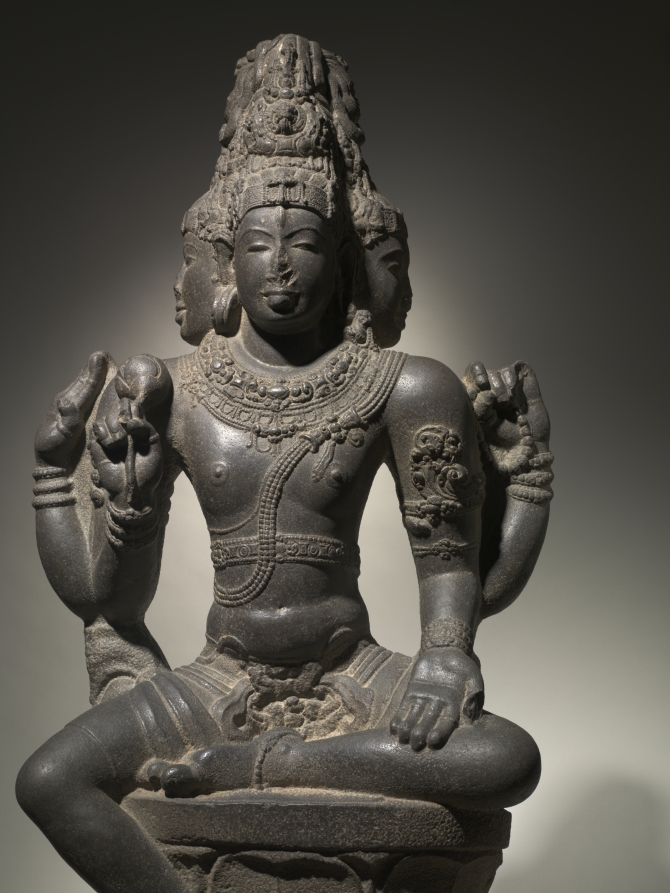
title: Brahma-Shiva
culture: South India, Tamil Nadu, Chola dynasty, late 10th - early 11th century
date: late 900s–1000s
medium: granite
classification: Sculpture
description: In the Hindu pantheon Brahma is in charge of carrying out the work of creation. In this tour-de-force of South Indian temple sculpture, he is in a special regal aspect, with the only elements of his typical priestly appearance being the prayer beads and the matted dreadlocks piled on his head. Four arms connote superhuman power, and four heads convey the idea that his creative activities spread in all four directions. His upper right hand enjoins freedom from fear, and the lower holds a lotus bud associated with birth and the process of creation. His lowered left hand is held in the gift-giving gesture, suggestive of the gift of creation he will bestow upon the world.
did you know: The back of the sculpture retains the original textured surface from a pointed chisel, suggesting it was in a niche or near a wall, protected from worshippers’ touches.